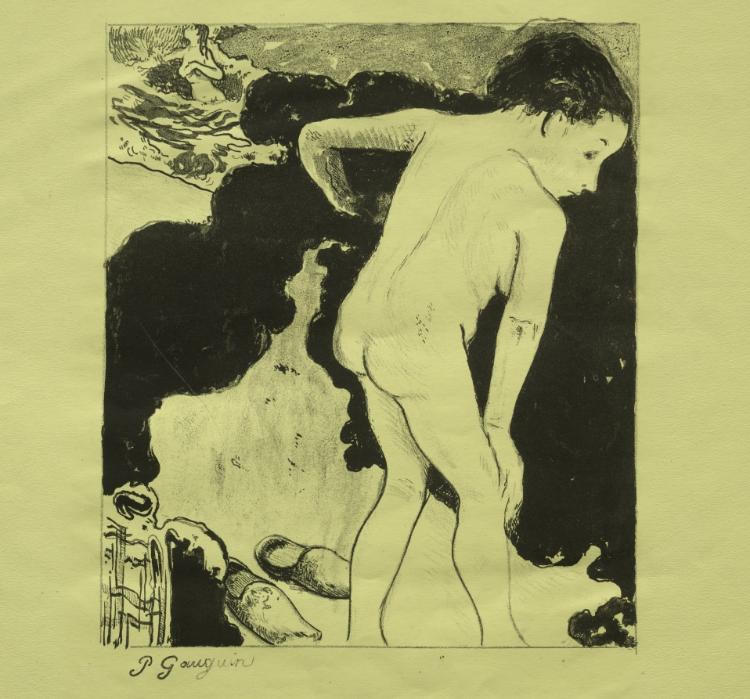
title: Volpini Suite: Breton Bathers (Baigneuses Bretonnes)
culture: France, 19th century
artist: Paul Gauguin (French, 1848–1903)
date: 1889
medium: zincograph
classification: Print